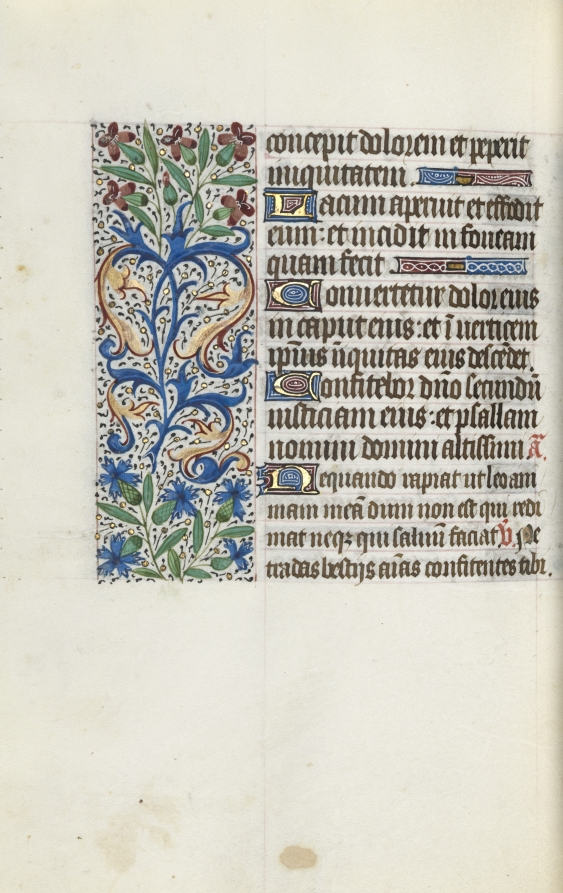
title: Book of Hours (Use of Rouen): fol. 114v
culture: France, Rouen, 15th century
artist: Master of the Geneva Latini (French, active Rouen, 1460–80)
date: c. 1470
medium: ink, tempera, and gold on vellum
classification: Bound Volume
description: In the late 1400s and early 1500s Rouen was an established and important center of book production. The city’s cathedral had a wealthy chapter that spent large sums of money to commission books and to maintain its extensive library. The stationers and booksellers would have likely been concentrated in or near the cathedral precinct. This artist, named after a manuscript now in Geneva, was Rouen’s principal illuminator during the second half of the 1400s.